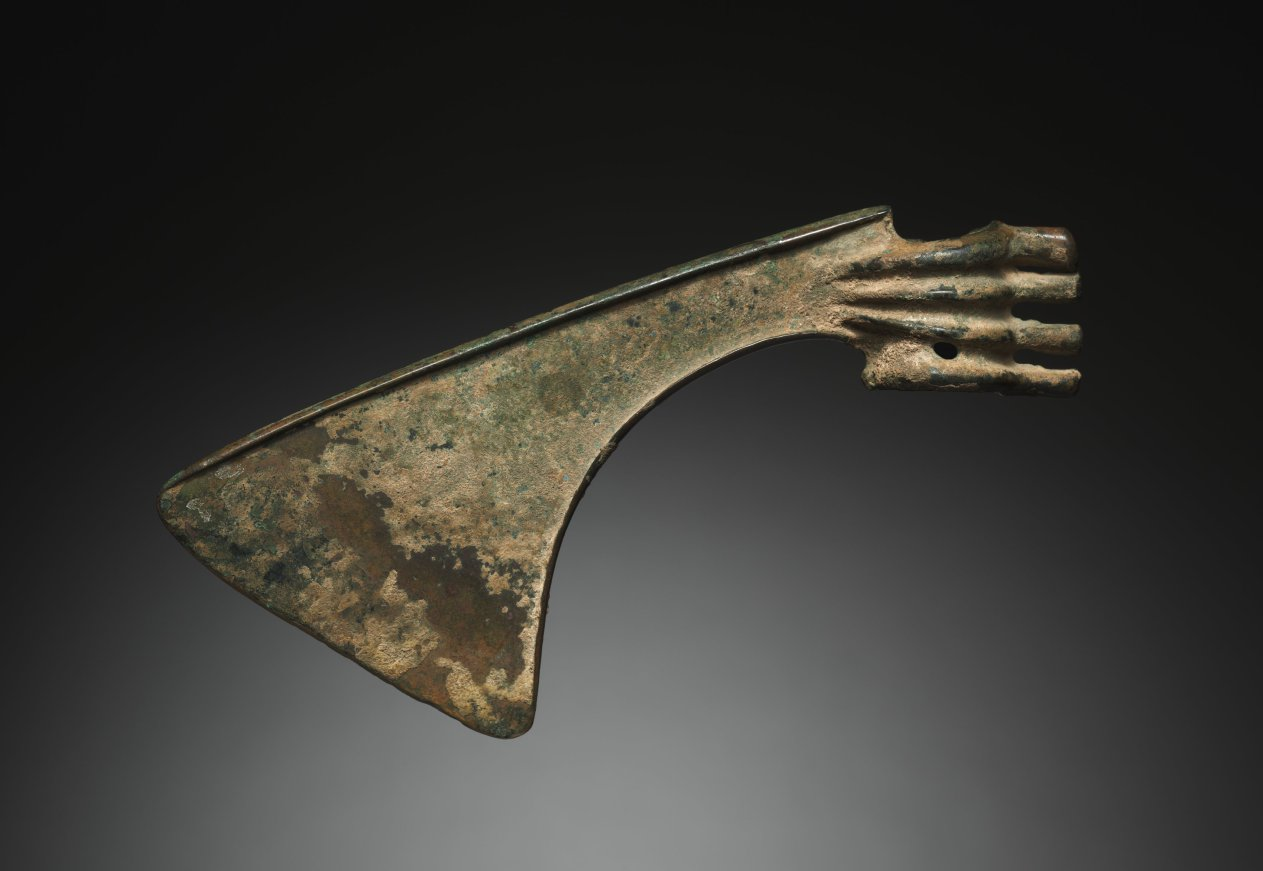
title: Axe-Head with Four Picks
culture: Iran, Luristan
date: 2000–1000 BCE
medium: bronze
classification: Metalwork